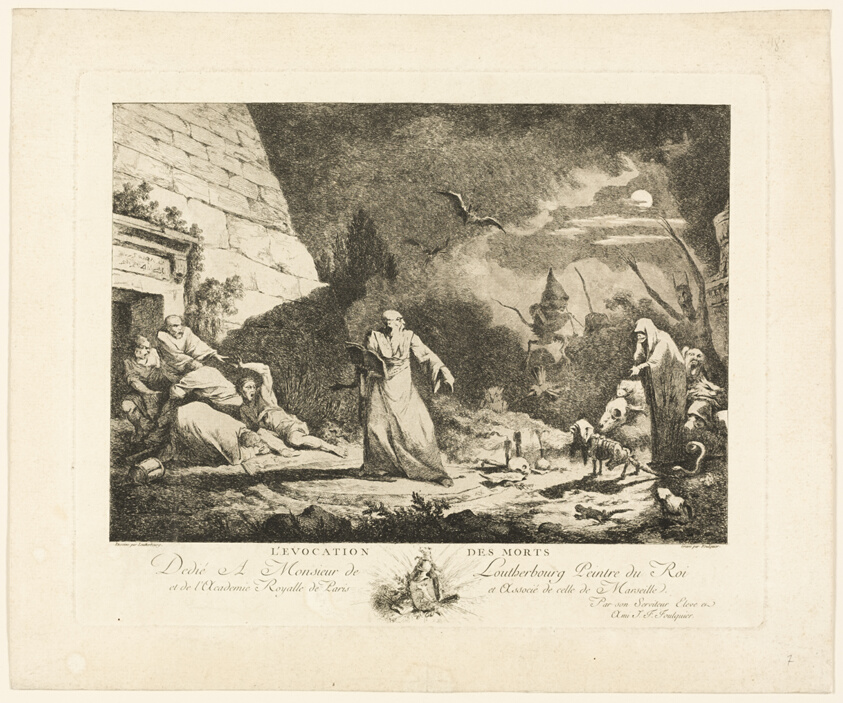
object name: Print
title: Evocation of the Dead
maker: Joseph Francoise Foulquier (French, 1749-1812); after Philip Jacques de Loutherbourg (French, 1740-1812)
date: 1770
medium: Etching and aquatint on paper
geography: France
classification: etching; print; prints and drawing